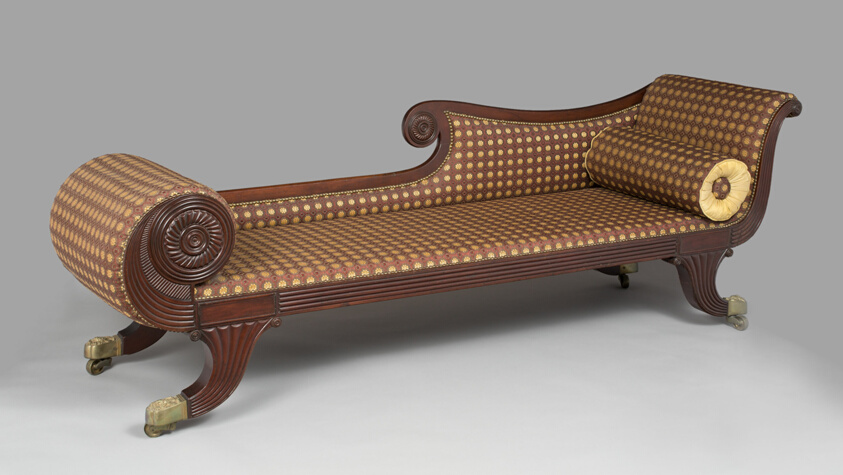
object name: Furniture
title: Grecian Couch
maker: Artist unknown (American, 19th century); New England or New York State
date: 1825–40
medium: Mahogany, birch, white pine, ebony inlay, and upholstery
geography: New England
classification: seating; furniture; american decorative arts; american arts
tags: furniture